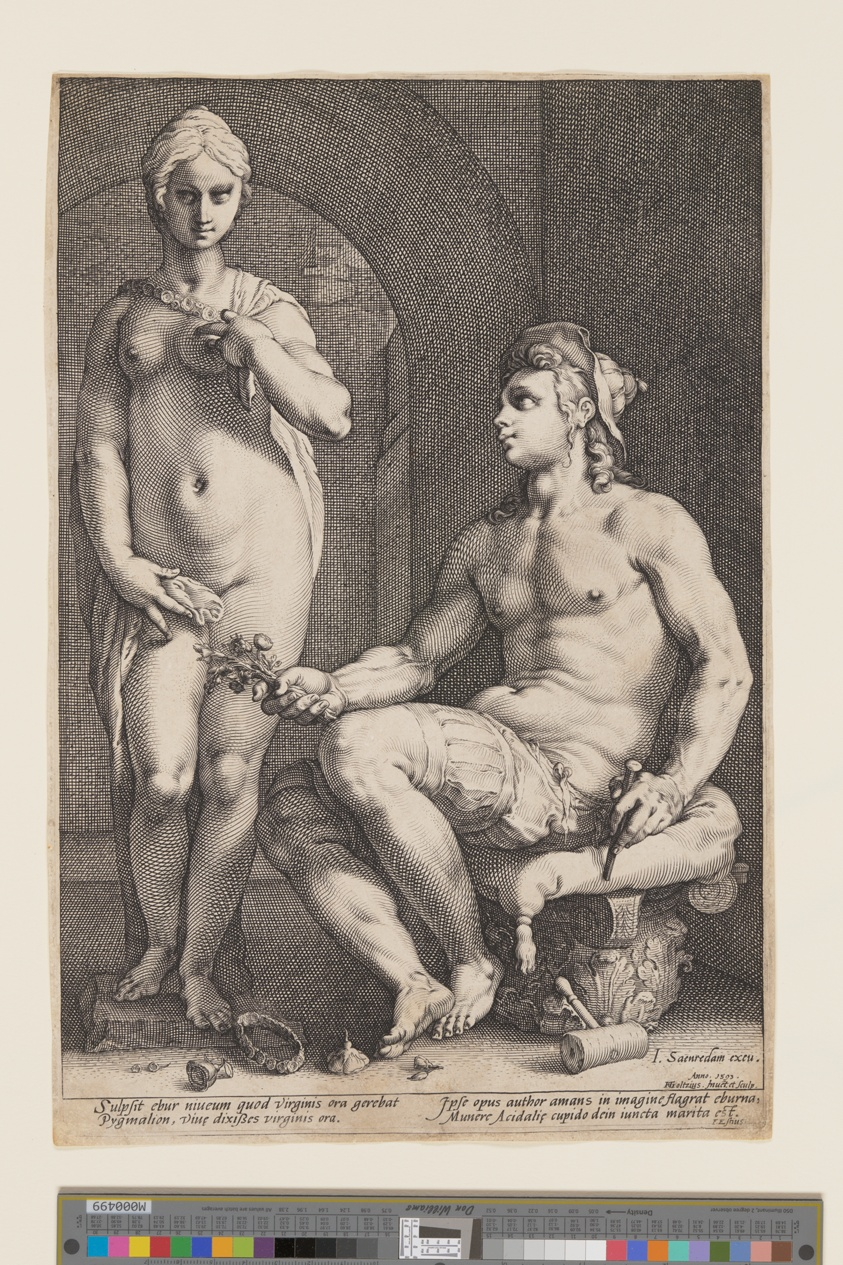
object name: Print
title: Pygmalion and Galatea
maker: Hendrick Goltzius (Dutch, 1558–1617)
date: 1593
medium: Engraving on ivory laid paper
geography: Netherlands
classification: engraving; paper; print; prints and drawing